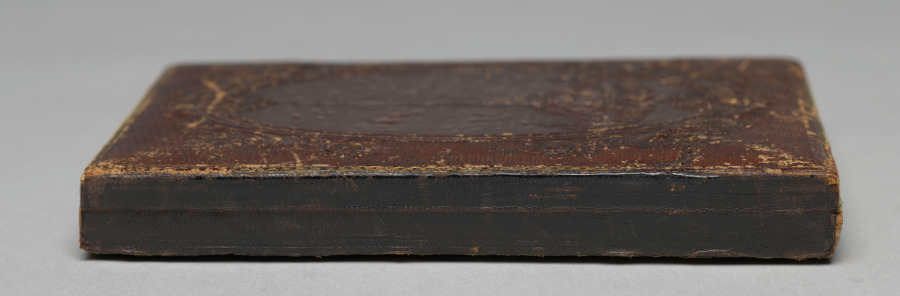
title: Buggy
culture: America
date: c. 1853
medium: daguerreotype, half-plate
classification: Photograph